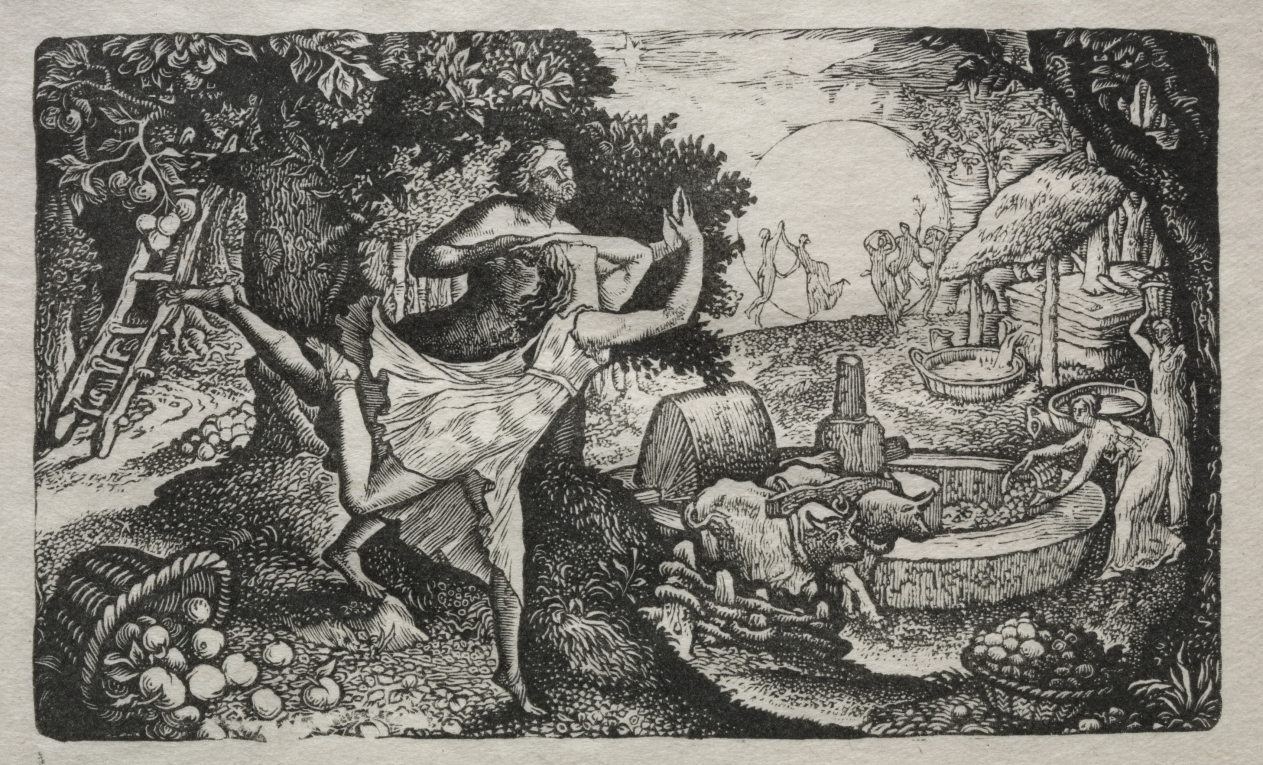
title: The Cyder Feast: A Vision of Joy and Thanksgiving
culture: England, 19th century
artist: Edward Calvert (British, 1799–1883)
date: 1829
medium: lithograph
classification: Print